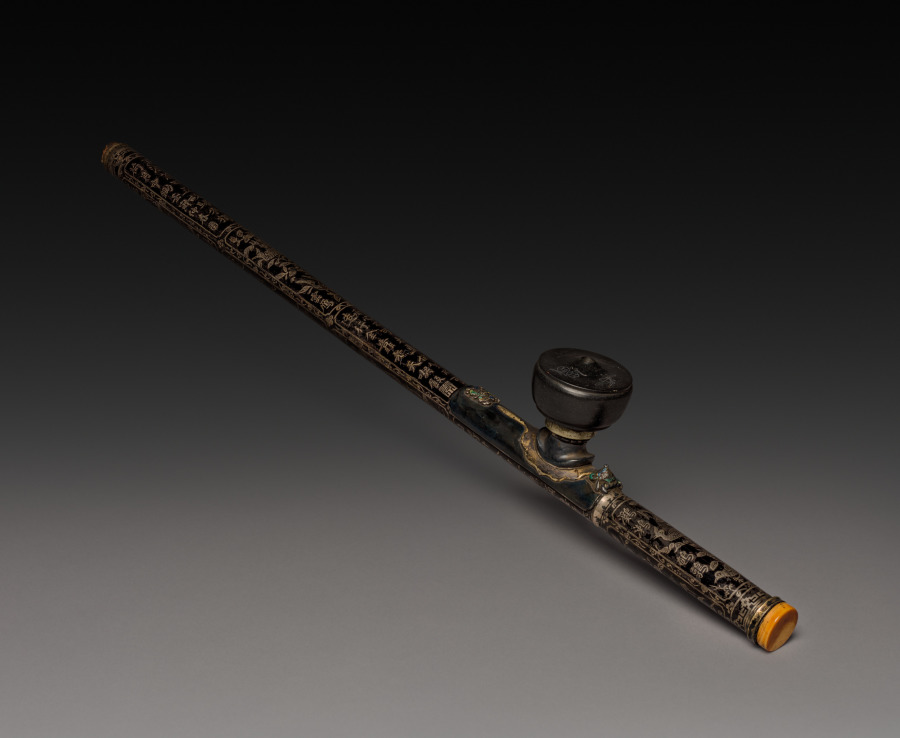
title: Opium Pipe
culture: China, Qing dynasty (1644-1911)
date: 1800s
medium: lacquer, ivory, jade and silver inlay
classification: Miscellaneous